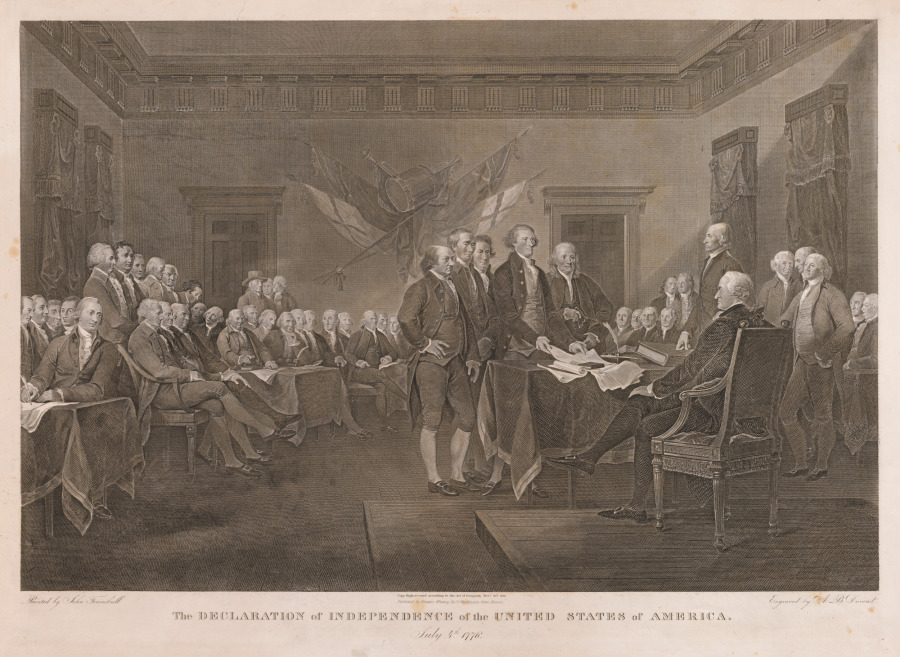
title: Signing the Declaration of Independence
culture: America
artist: Asher B. Durand (American, 1796–1886)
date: 1823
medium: etching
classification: Print